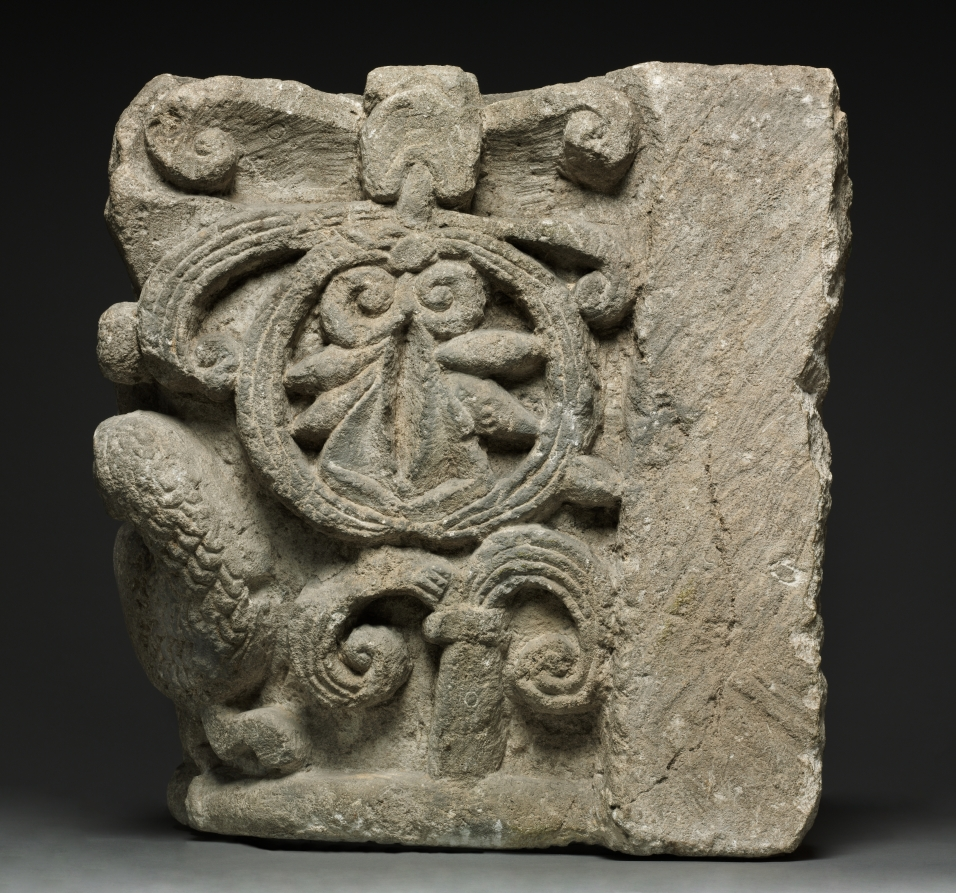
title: Engaged Capital with a Fantastic Creature and Three Birds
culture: Western France, Bordelais, early 12th century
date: early 1100s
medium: limestone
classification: Sculpture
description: The closest parallels for the dramatic, heavy style of this capital appear in the capitals of the porch of Saint-Seurin in Bordeaux.